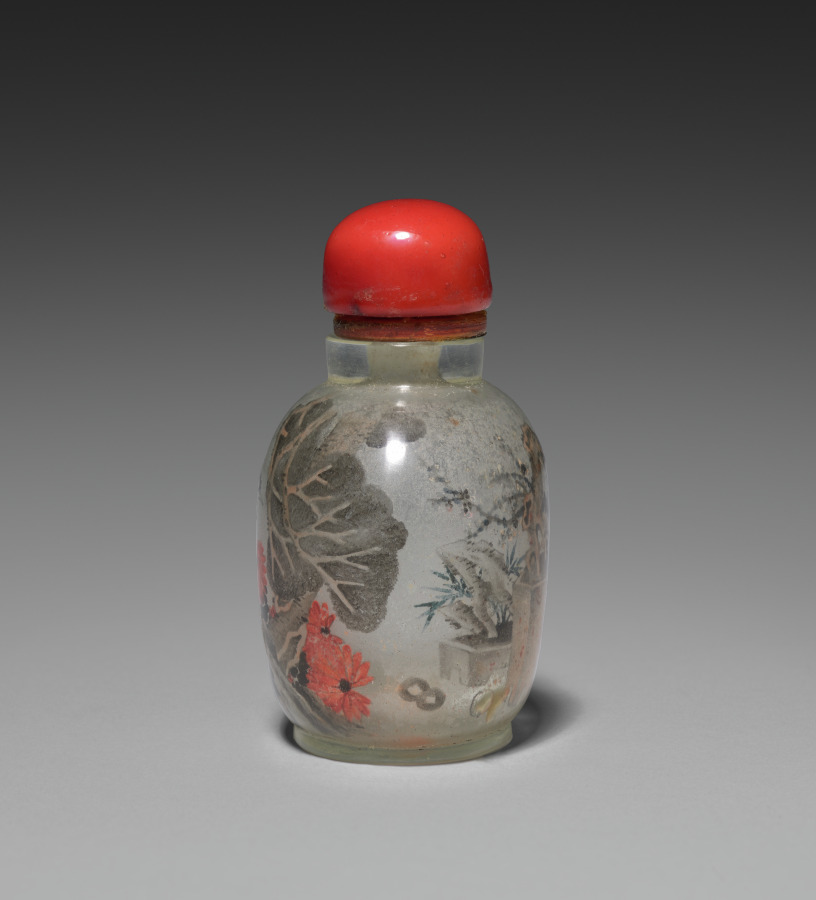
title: Snuff Bottle with Stopper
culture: China, Qing dynasty (1644–1911), Qianlong reign (1736–95)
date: 1736–95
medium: crystal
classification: Stone